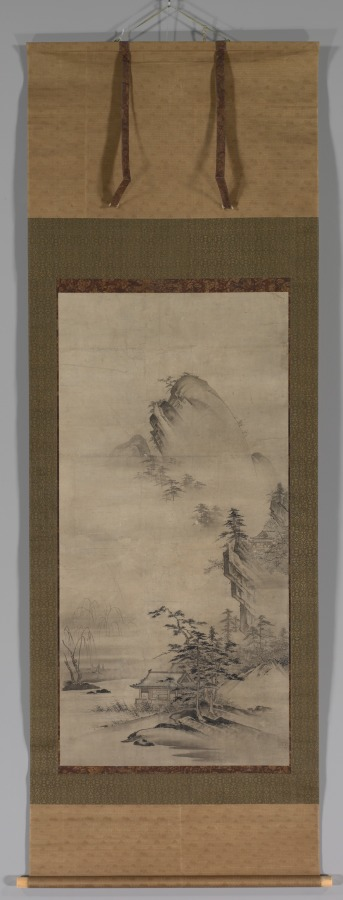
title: Landscape with a Pavilion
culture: Japan, Edo period (1615–1868)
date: c. 1700–1868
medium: hanging scroll; ink on paper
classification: Painting